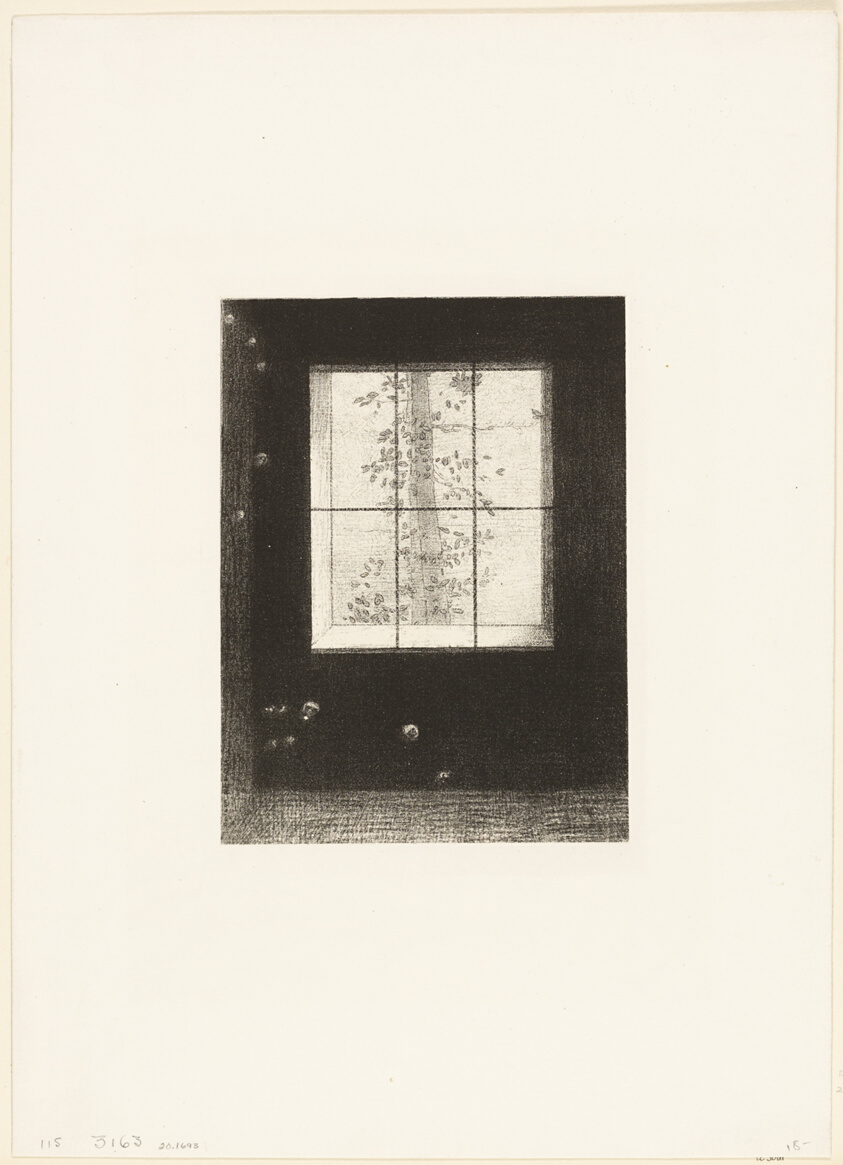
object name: Print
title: Day, plate 6 from Dreams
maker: Odilon Redon (French, 1840-1916)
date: 1891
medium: Lithograph in black on ivory China paper laid down on white wove paper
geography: France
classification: lithograph; print; prints and drawing; paper